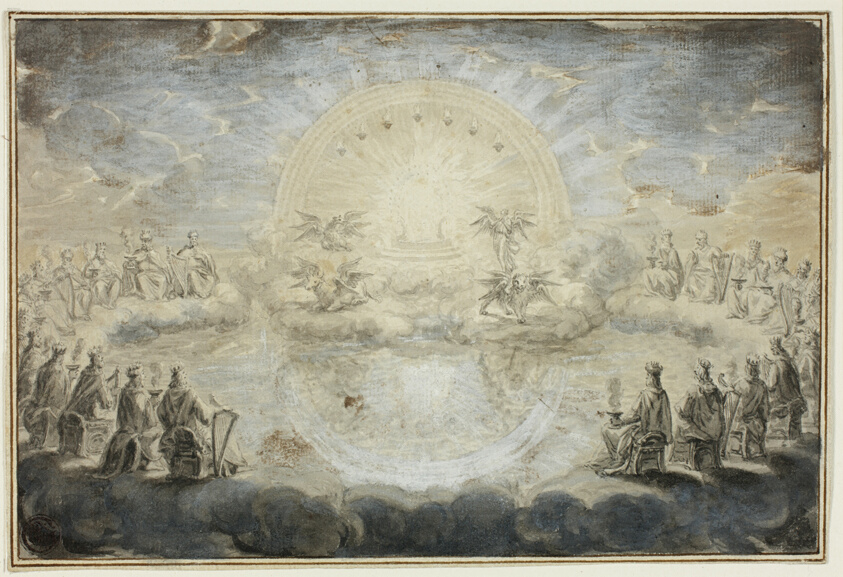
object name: Drawing and Watercolor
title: Scene from Revelations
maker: Ottmar Elliger, the younger (German, 1666-1735)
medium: Pen and gray ink with brush and gray wash and lead white (partly discolored) on cream laid paper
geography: Germany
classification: ink or chalk wash; drawings (visual works); prints and drawing